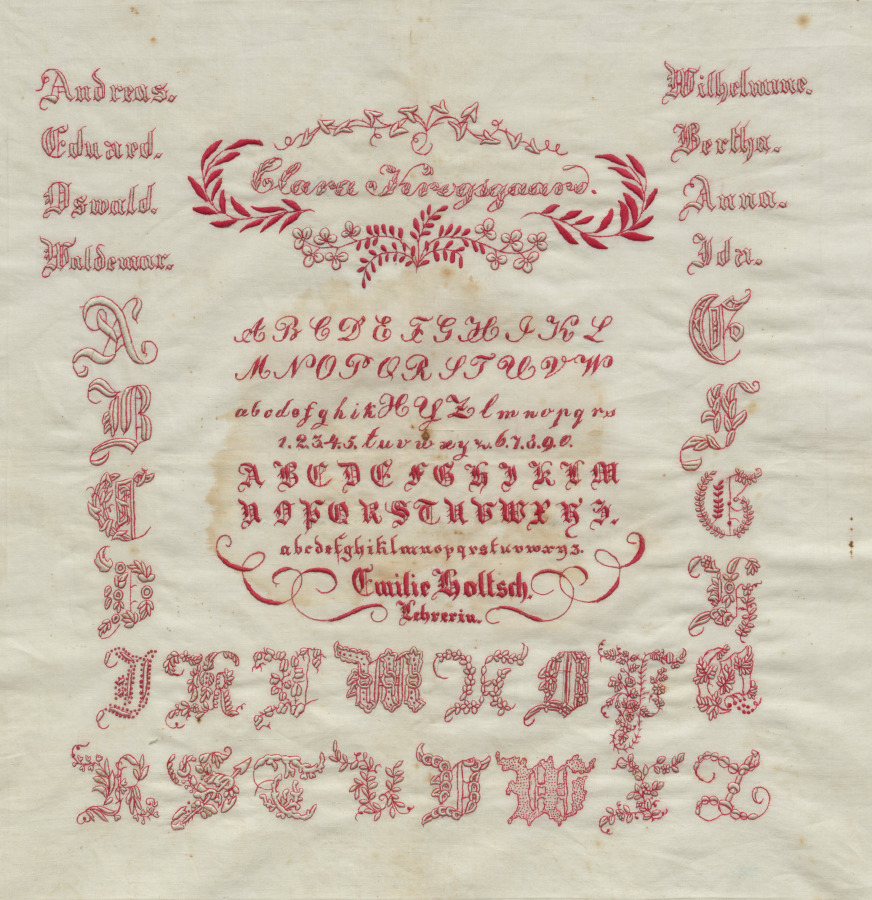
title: Sampler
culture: Germany, 19th century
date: 1800s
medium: embroidery; cotton on cotton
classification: Sampler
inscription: top center: "Clara Krogsgaard"; upper left: "Andreas./ Eduard./ Oswald./ Waldemar."; upper right: "Wilhelmme./ Bertha./ Anna./ Ida."; center, rows of alphabet and numerals, below: "Emilie Boltsch./ Lehrerin"; on either side and below center alphabet and numerals, another set of alphabet.